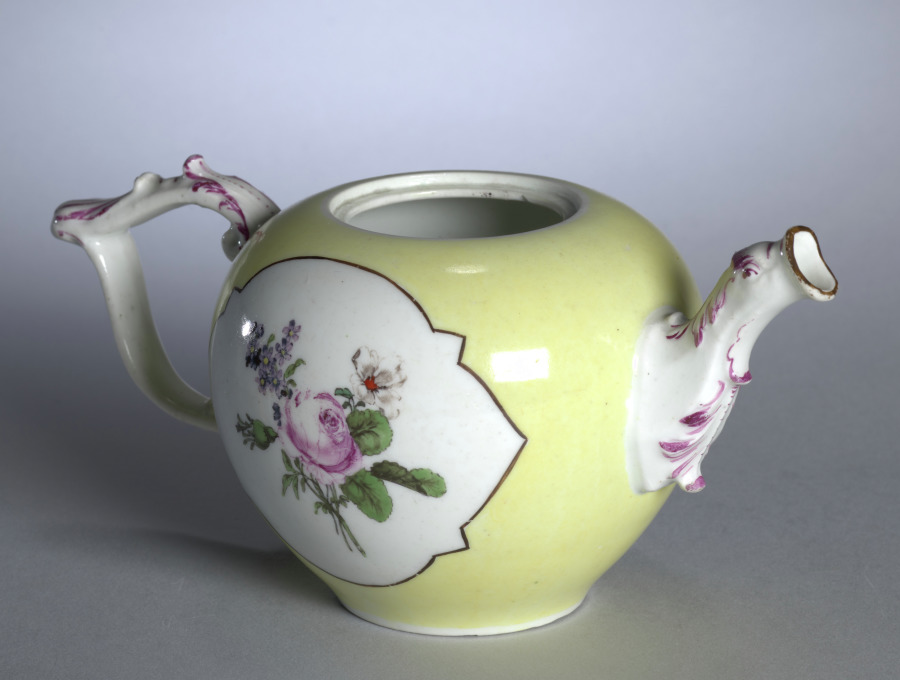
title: Teapot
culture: Germany, Meissen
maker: Meissen Porcelain Factory (German, est. c. 1710)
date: c. 1750–70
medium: porcelain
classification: Ceramic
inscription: Mark on the bottom that looks like two swords crossing, with a small V intersecting.